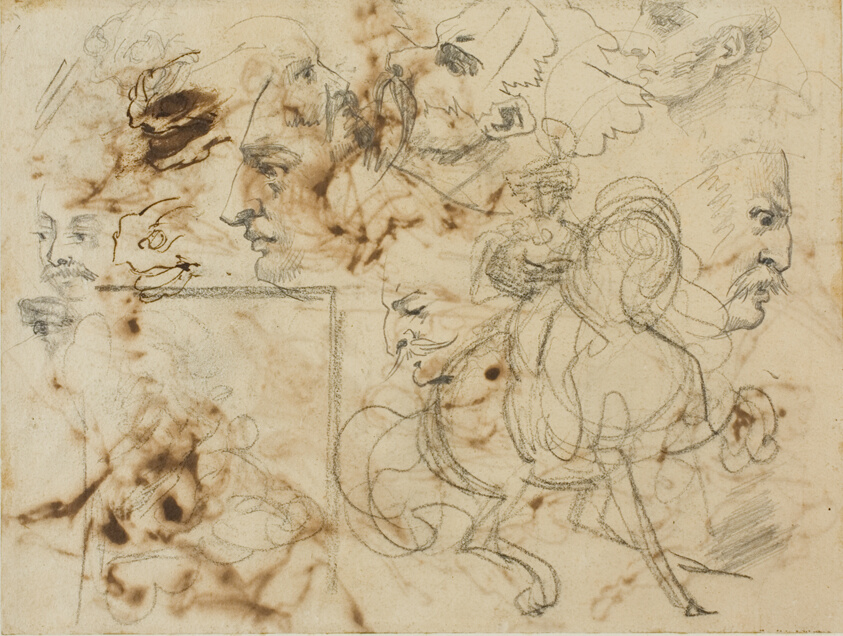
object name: Drawing and Watercolor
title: Sketches of Men's Faces, Horses' Muzzles, and Mounted Soldiers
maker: Jean Louis André Théodore Géricault (French, 1791-1824)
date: 1813/14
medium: Graphite and black crayon with pen and brown ink on tan wove paper, perimeter mounted on ivory laid paper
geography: France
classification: drawings (visual works); prints and drawing